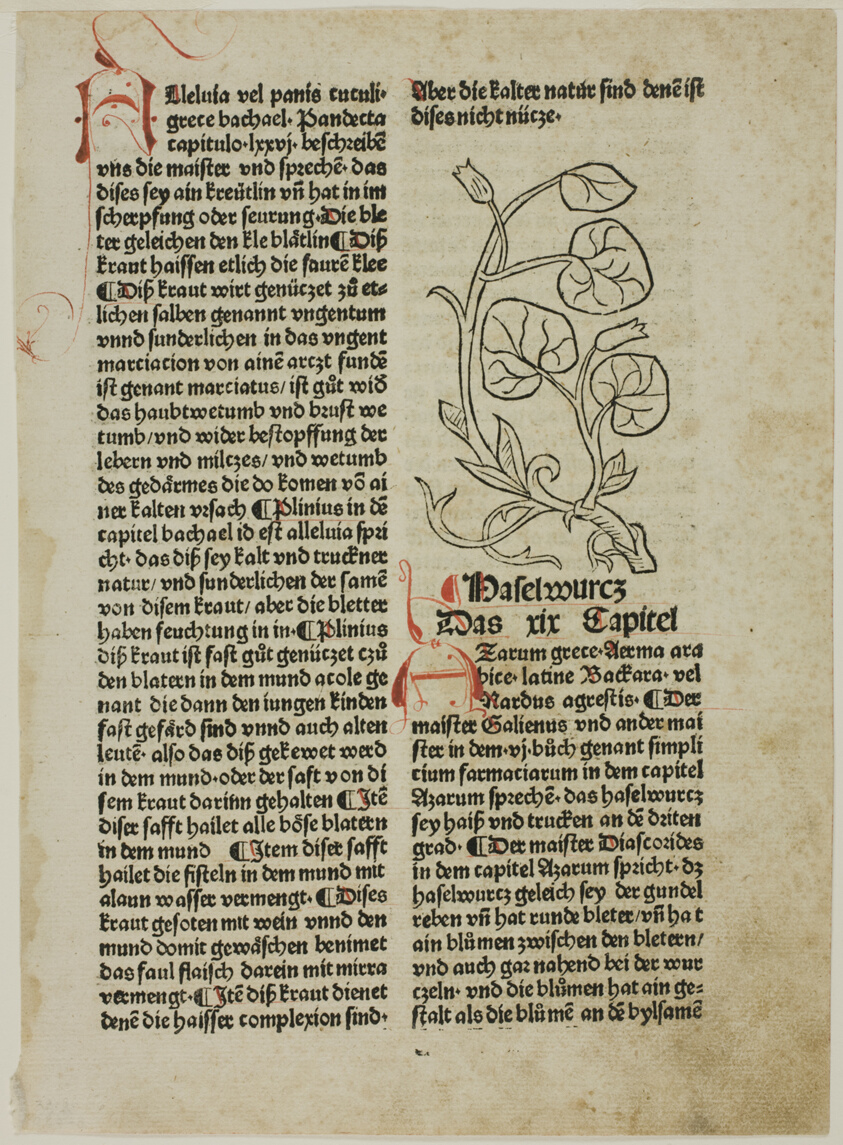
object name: Print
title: Hazelwort from Gart der Gesundheit (Garden of Health), Plate 16 from Woodcuts from Books of the 15th Century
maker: Unknown Artist (Ulm, 15th century); printed and published by Konrad Dinckmut (German, active 1476-1499); original text by Johann Wonnecke von Cube (German, c. 1430–1503); portfolio text by Wilhelm Ludwig Schreiber (German, 1855–1932)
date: 1487, portfolio assembled 1929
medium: Woodcut and letterpress in black with rubrication (recto), and letterpress in black with rubrication and pen and brown ink additions (verso), on buff laid paper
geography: Germany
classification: woodcut; print; prints and drawing